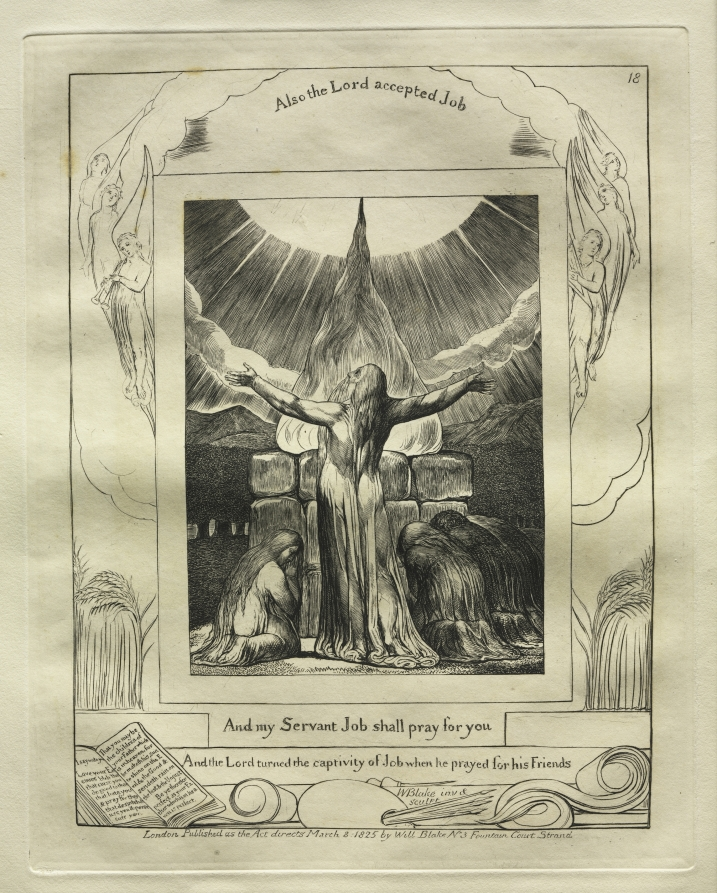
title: The Book of Job: Pl. 18, And my Servant Job shall pray for you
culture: England, 19th century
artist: William Blake (British, 1757–1827)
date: 1825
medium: engraving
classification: Print